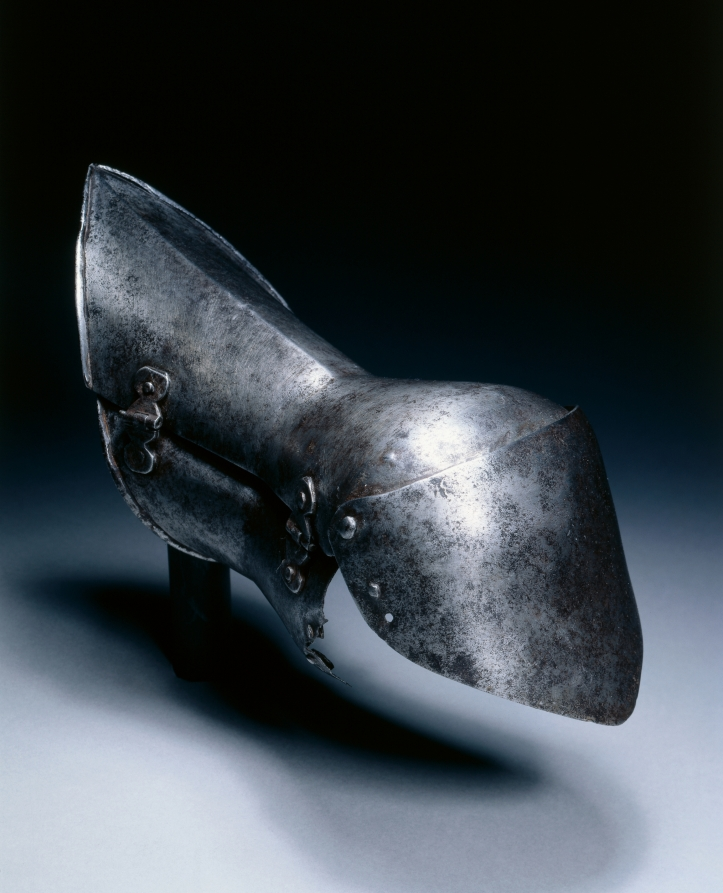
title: Gothic Mitten Gauntlet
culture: Italy, 15th century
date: c. 1450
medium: steel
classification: Arms and Armor